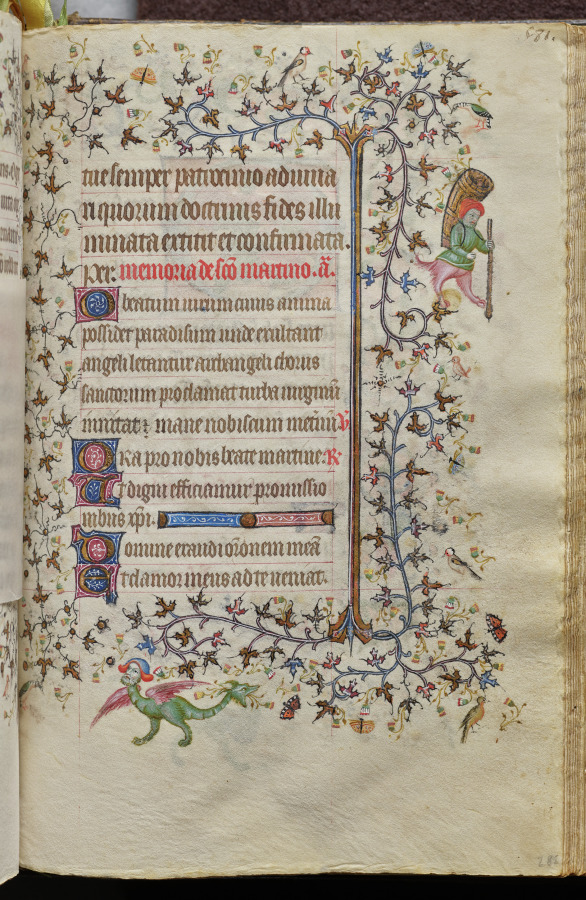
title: Hours of Charles the Noble, King of Navarre (1361-1425): fol. 285r, Text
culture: France, Paris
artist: Master of the Brussels Initials and Associates (French)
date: c. 1405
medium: ink, tempera, and gold on vellum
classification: Bound Volume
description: This precious volume was obviously highly prized by its owner, the French-born King of Navarre, who had his coat of arms painted on no less than twenty folios. Rather than directly commissioning this manuscript from a specific workshop, it seems that Charles the Noble acquired his book of hours -- perhaps ready-made for the luxury market -- while on a trip to Paris in 1404-05. A collaborative effort, six painting styles are evidenced within the pages of this codex, those of two Italians, two Frenchmen, and two Netherlanders. The painter who was responsible for the planning and decoration of the book, and who produced seventeen of the large miniatures, was a Bolognese artist known as the Master of the Brussels Initials. His principal assistant, responsible for most of the borders, was a Florentine who signed his name "Zecho" da Firenze on folio 208 verso.